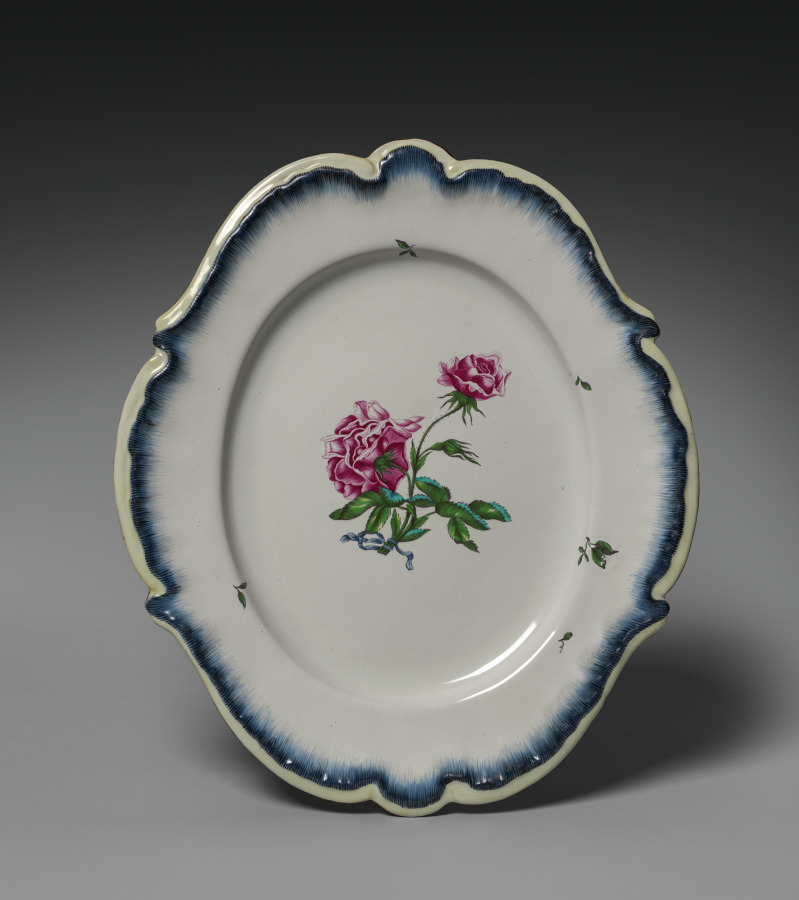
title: Stand for a Tureen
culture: France, Strasbourg, 18th century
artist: Paul Hannong Factory (French)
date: c. 1750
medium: tin-glazed earthenware (faience) with enamel decoration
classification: Ceramic